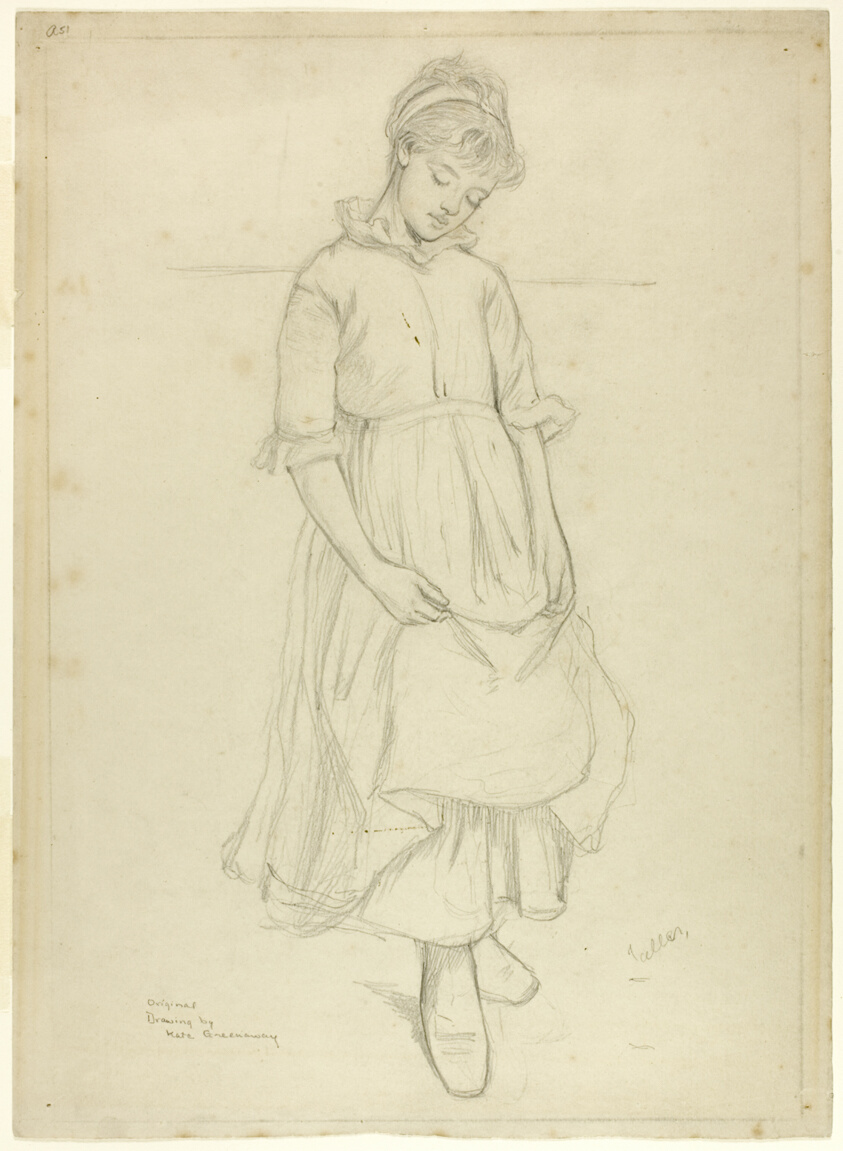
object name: Drawing and Watercolor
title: Standing Girl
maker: Attributed to Kate Greenaway; English, 1846-1901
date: c. 1870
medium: Graphite on ivory wove paper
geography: England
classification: graphite; drawings (visual works); prints and drawing